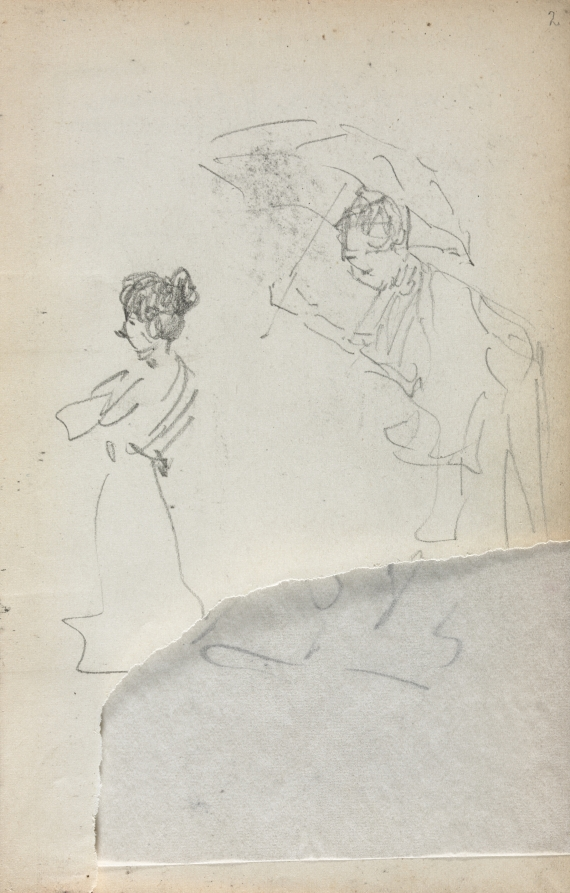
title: Italian Sketchbook: Standing Woman in profile & Man with an Umbrella (page 2)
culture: America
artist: Maurice Prendergast (American, born Newfoundland [now Canada], 1858–1924)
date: 1898–1899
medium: pencil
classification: Bound Volume